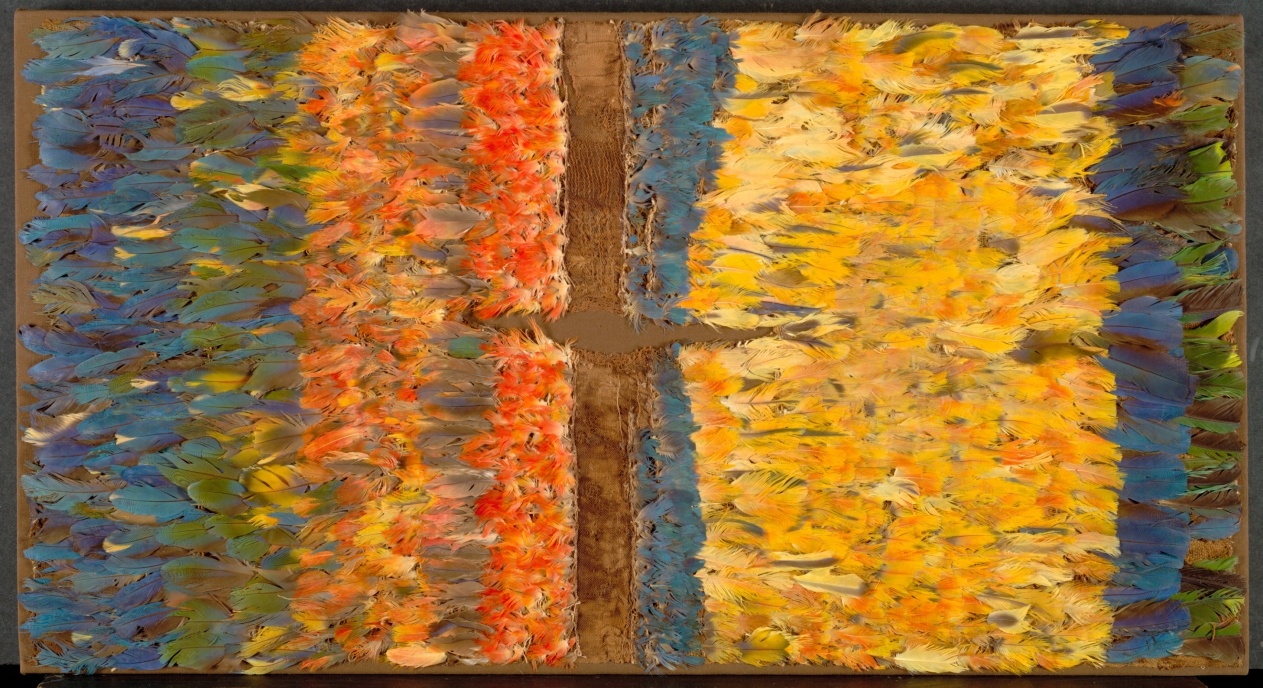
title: Feathered Tabard or Tunic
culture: Andes, 7th-15th century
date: 600–1500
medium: polychrome feathers sewn to cotton tabby ground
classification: Textile